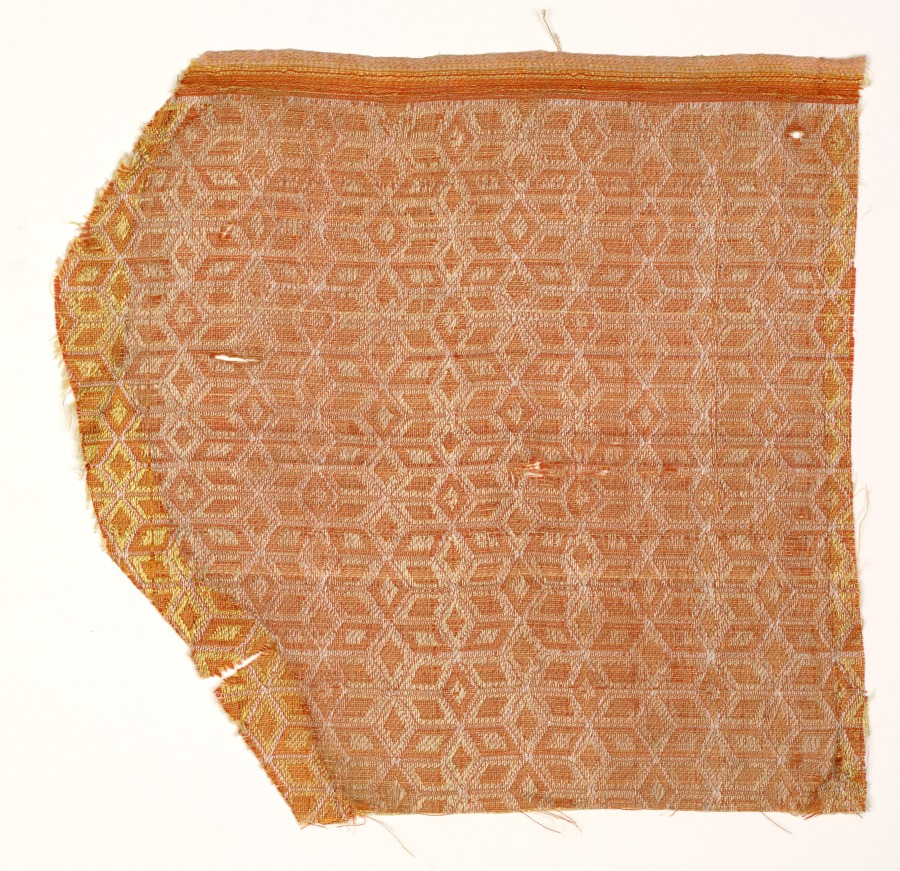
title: Fragment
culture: China, 19th century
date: 1800s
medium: silk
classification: Textile